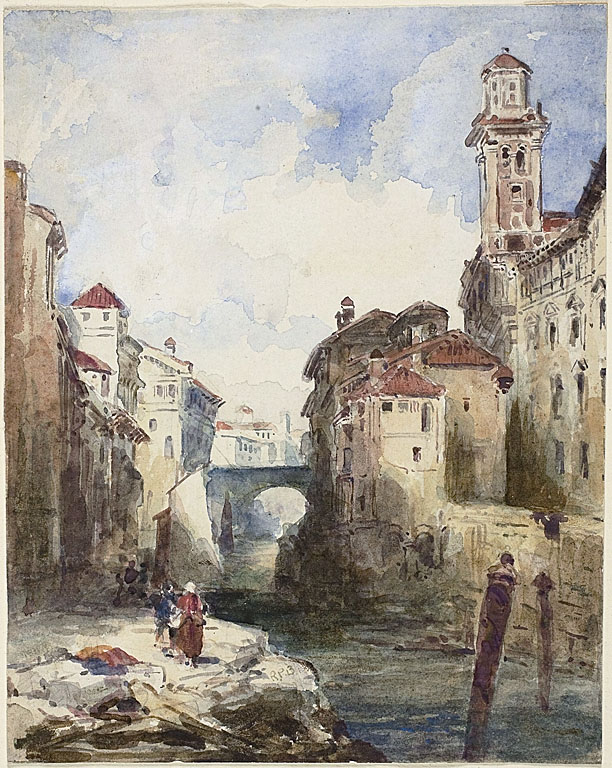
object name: Drawing and Watercolor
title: French Town, Buildings and River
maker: Richard Parkes Bonington (English, 1802-1828)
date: 1821/8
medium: Watercolor on paper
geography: England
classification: watercolor; drawings (visual works); prints and drawing